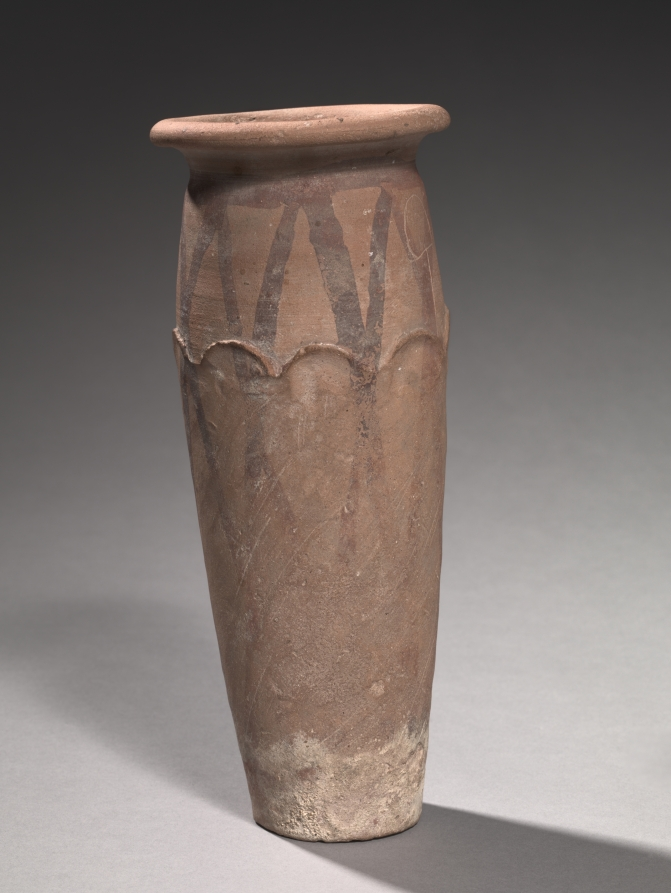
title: Wavy-Lined Jar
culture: Egypt, Predynastic (5000–2950 BCE), Naqada III (3200–3000 BCE)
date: 4000–3000 BCE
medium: marl clay pottery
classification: Vessels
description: Tall slender jars decorated with a wavy line in relief occur toward the end of the Predynastic Period. The netlike motif imitates the kind of rope sling or cradle that was used to carry this type of jar without handles.